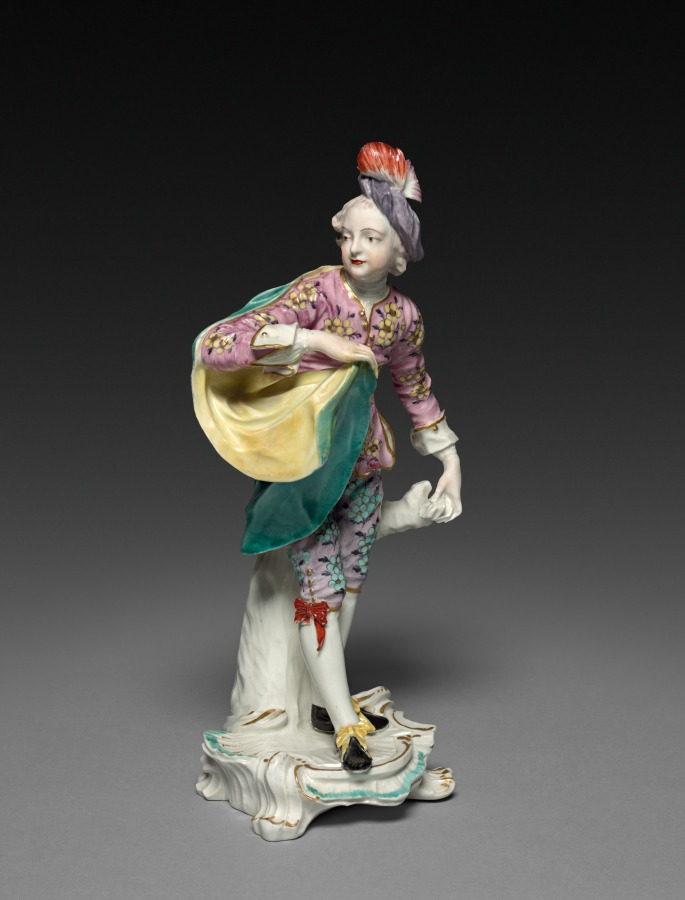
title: Dancer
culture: England, Derby, 18th century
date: c. 1760–1765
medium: soft-paste porcelain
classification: Ceramic